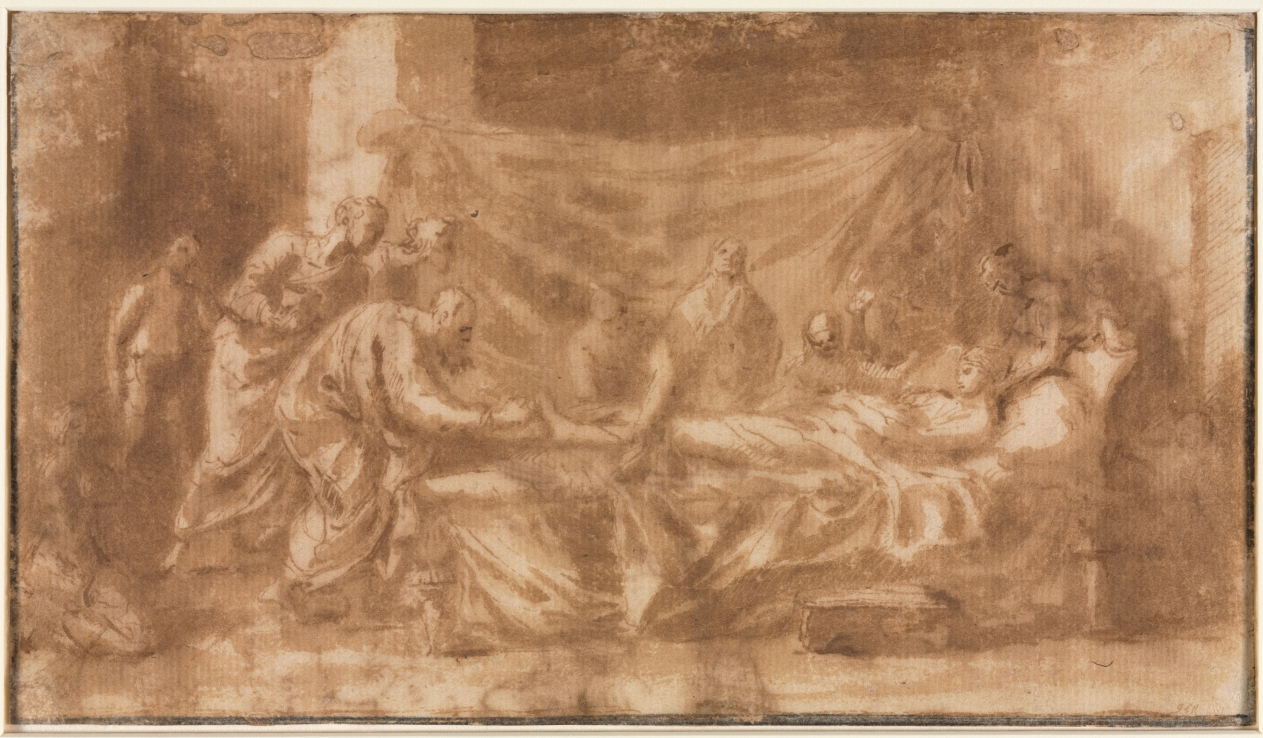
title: Extreme Unction (recto)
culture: France, 17th century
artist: Nicolas Poussin (French, 1594–1665)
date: 1643–1644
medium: pen and brown ink and brush and brown wash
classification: Drawing